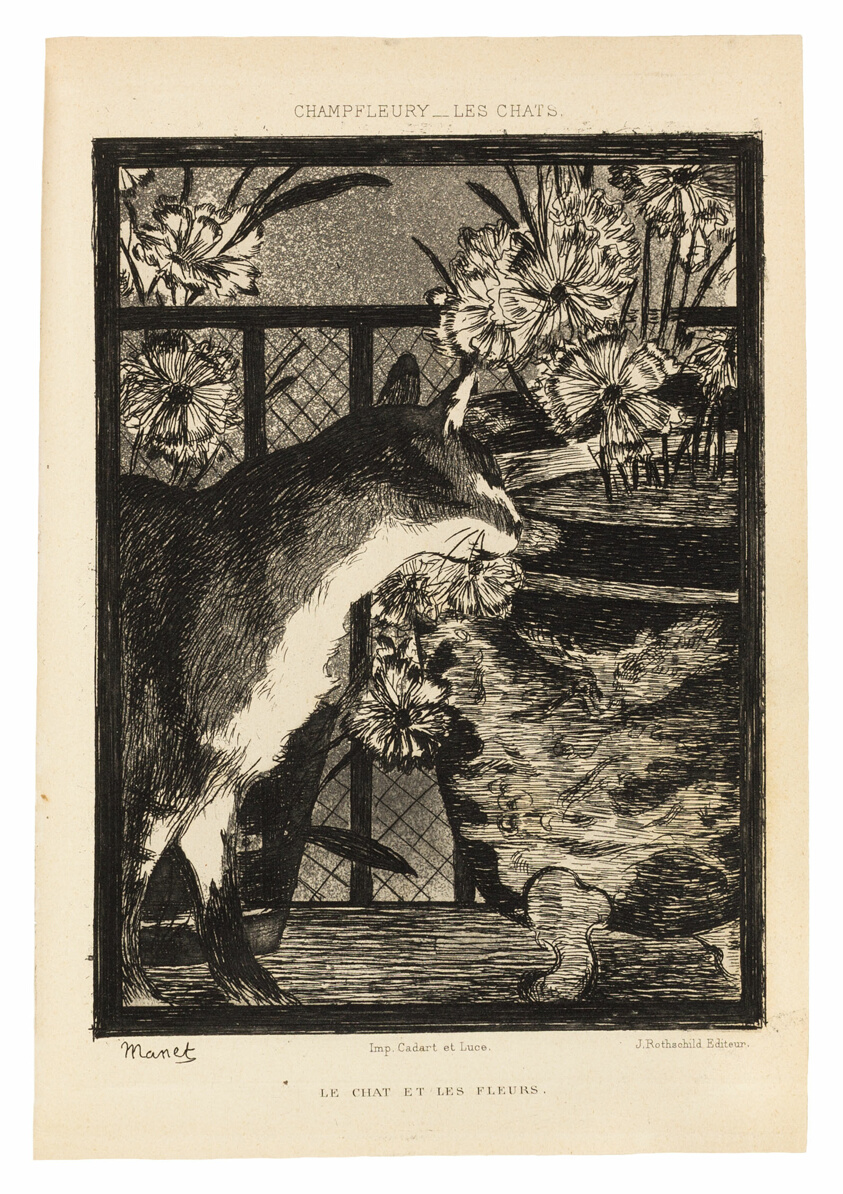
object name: Book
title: Les Chats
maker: Original prints by Édouard Manet (French, 1832–1883), Marie Champfleury (French, 19th century) after Burbanck (British, 19th century), Louis Eugène Lambert (French, 1825–1900), Armand Désiré Gautier (French, 1825–1894), and Victor Eugène Géruzez (Crafty) (French, 1840–1906); illustrations by Charles Kreutzberger (French, 1829–1909), M. Mérimée (French, 19th century), Lorédan Larchey (French, 1831–1902), Prisse d'Avennes (French, 1807–1879), and Edmond Morin (French, 1824–1882); some works etched by M. Comte (French, 19th century) and Firmin Gillot (French, 1820–1872) after works by Eugène Delacroix (French, 1798–1863), Gottfried Mind (Swiss, 1768–1814), Utagawa Hiroshige (erroneously attributed to Hokusai) (Japanese, 1797–1858), Pierre-Paul Prud'hon (French, 1758–1823), Théodule Augustin Ribot (French, 1823–1891), Cornelis Visscher (Dutch, c. 1629–1658), Jean Morin (French, 1600–1650), Jean Ignace Isadore Grandville (J.J. Grandville) (French, 1803–1847), Ferdinand van Kessel (Dutch, 1648–1696) (erroneously attributed to Bruegel) and Viollet-Le-Duc (French, 1814–1879); written by Champfleury (Jules-François-Félix Husson-Fleury) (French, 1821–1889); published by J. Rothschild (French, 19th century); and Libraire de la Société Botanique de France (French, 19th century); typography by Gustave Silbermann (French, 1801–1876); printed by Cardart et Luce (French, 19th century)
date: 1870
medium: Book with five etchings, two with aquatint and three with plate tone, one color lithograph, and line block prints, two with hand-coloring, with letterpress in black on ivory wove paper, with cardboard and paper cover and leather spine with gilt lettering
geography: France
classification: book; prints and drawing